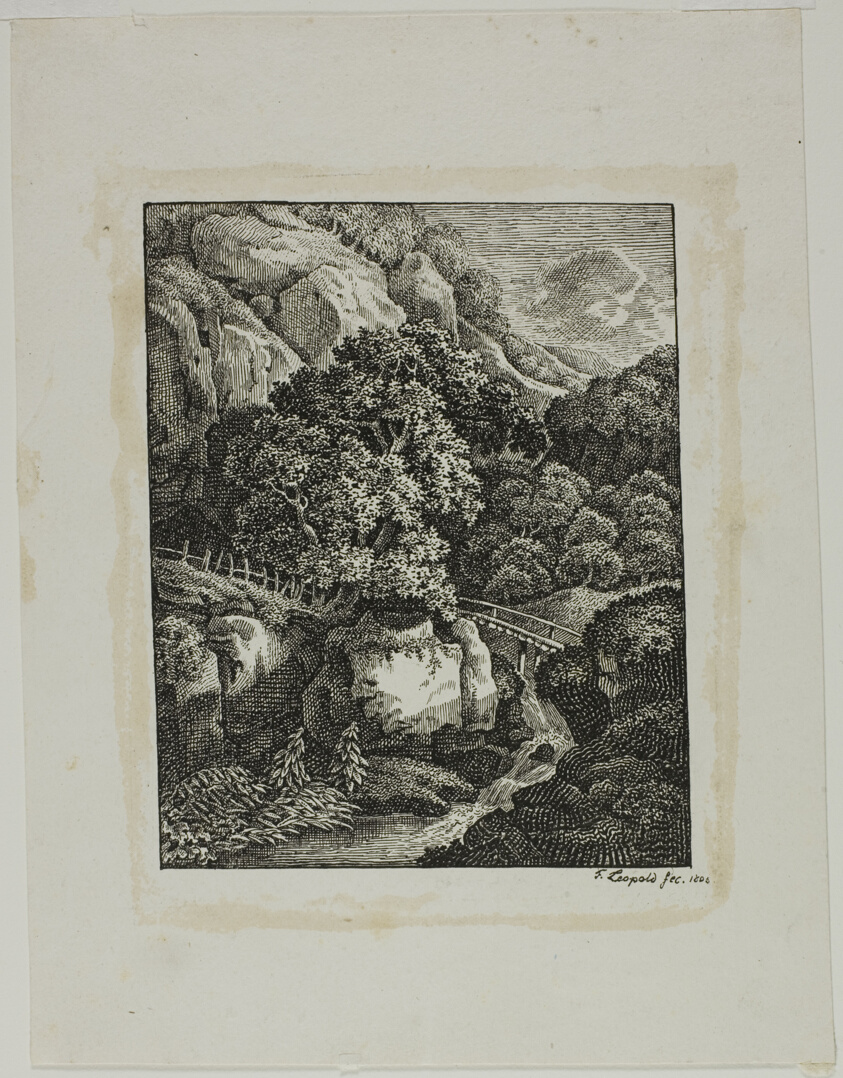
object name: Print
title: Wooded Mountain Landscape with a Small Waterfall and Pathway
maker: Franz Joseph Leopold (German, 1783–1832)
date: 1805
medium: Lithograph in black on white wove paper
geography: Germany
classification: etching; print; prints and drawing